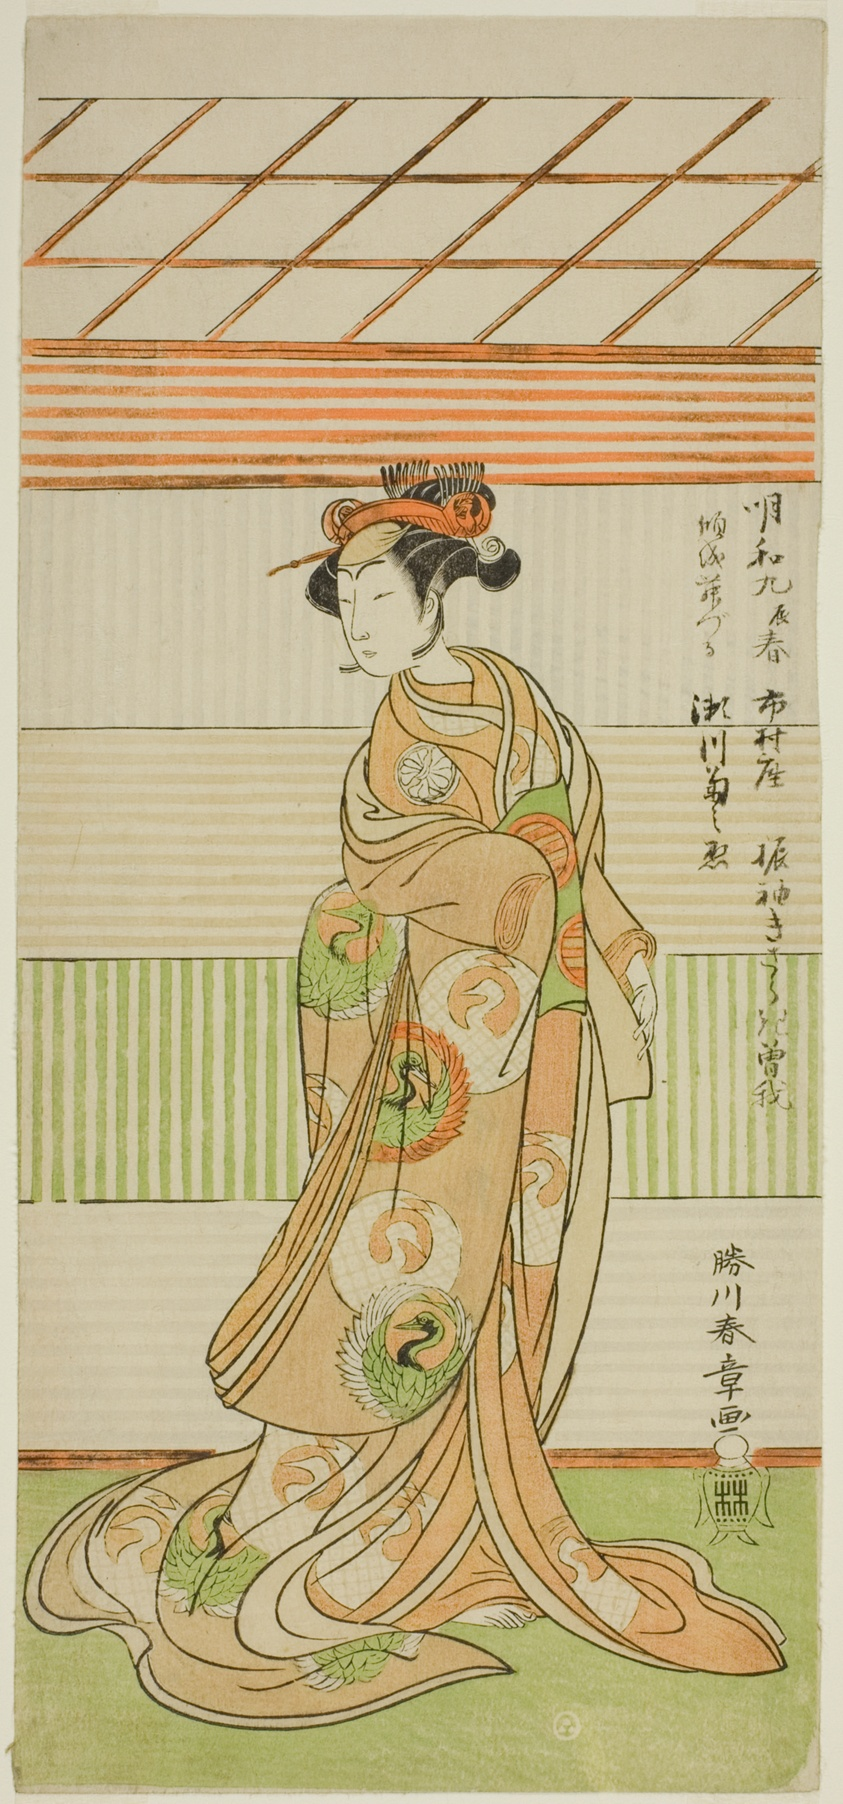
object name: Print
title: The Actor Segawa Kikunojo II as the Courtesan Maizuru in the Play Furisode Kisaragi Soga, Performed at the Ichimura Theater in the Second Month, 1772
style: Japanese (culture or style)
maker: Katsukawa Shunsho 勝川 春章; Japanese, 1726-1792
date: c. 1772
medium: Color woodblock print; hosoban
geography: Japan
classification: woodblock print; print; asian art